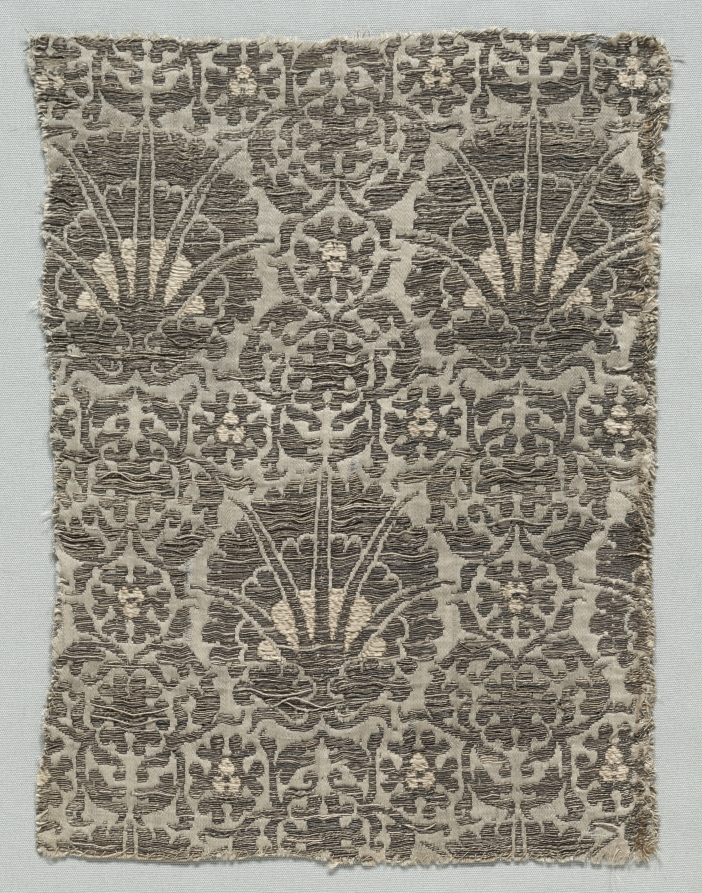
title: Silk Fragment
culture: Italy, second half of 14th century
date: 1350–1399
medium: lampas weave, silk and gold thread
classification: Textile